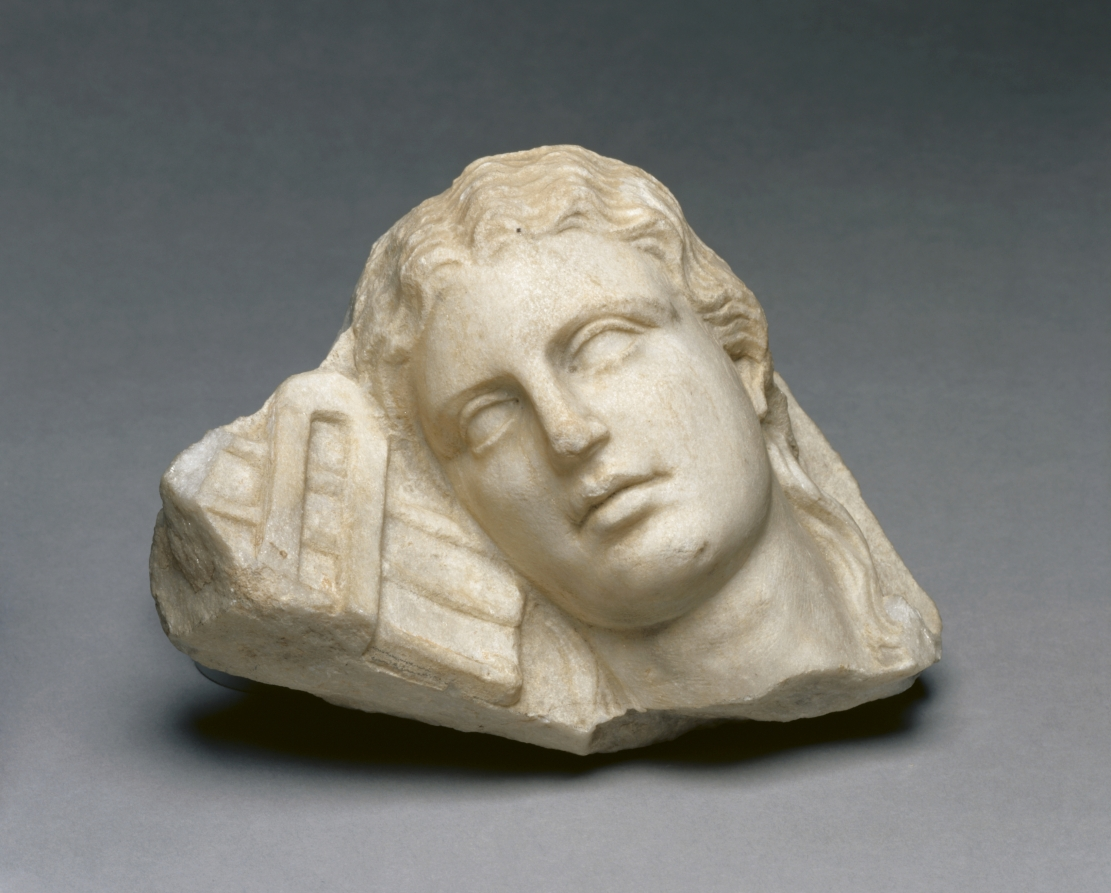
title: Head of a Woman Holding a Sistrum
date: 150 BCE–50 CE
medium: marble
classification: Sculpture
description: This head of a woman was likely originally part of a stele or grave marker. The woman sits in partial profile holding a sistrum close to her head, possibly making music. A sistrum is a type of rattle that originated in ancient Egypt and spread to the Greek world. (View a sistrum in the collection here: 1920.1990.) The sistrum likely signaled to ancient viewers that the woman on the grave marker was a worshiper of the Egyptian goddess Isis, whose cult spread throughout the Mediterranean after Alexander the Great took over Egypt.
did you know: A sistrum (rattle) can have either three or four branches through the body of the instrument.